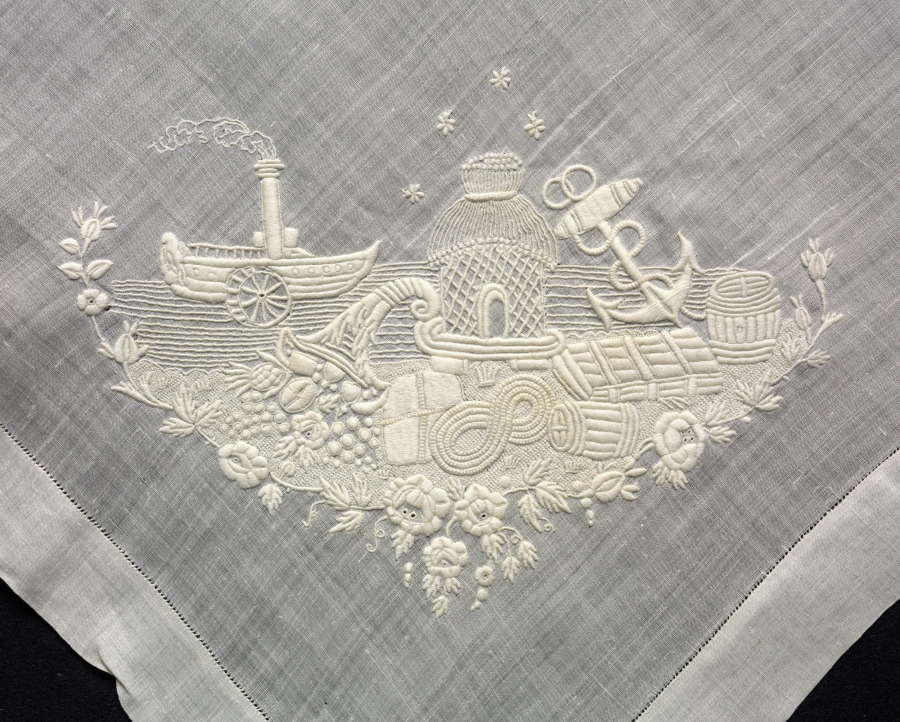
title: Embroidered Handkerchief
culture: Italy(?)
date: 1800s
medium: Plain weave linen, embroidered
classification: Embroidery